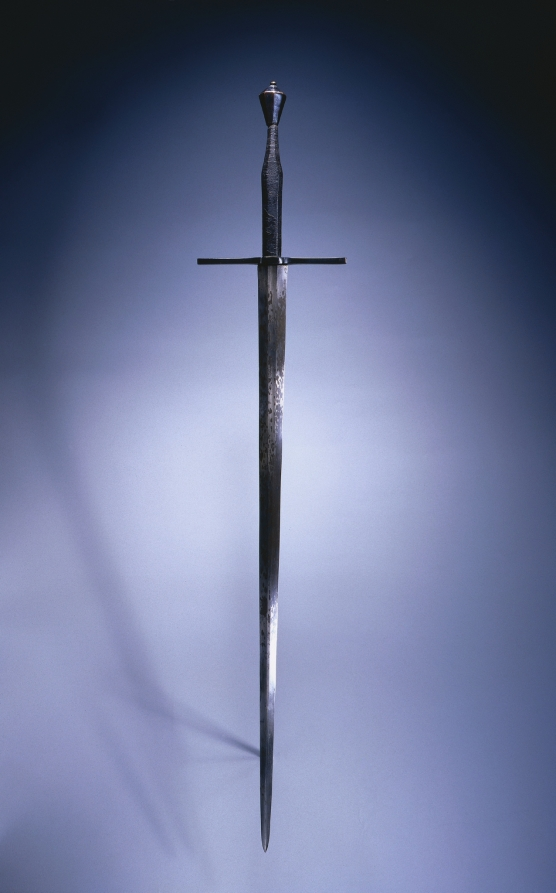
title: Hand-and-a-Half Sword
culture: Germany, mid-16th century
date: c. 1550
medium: steel, blued pommel and quillions, leather grip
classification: Arms and Armor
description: A hand-and-a-half sword is a large sword with a double-edged blade and a long grip so it could accommodate both hands. It was also know as a bastard sword. It would primarily be used with one hand, but if desired, the second hand could be used to give extra weight to the blow.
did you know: There are three unidentified marks on the fuller of this blade.